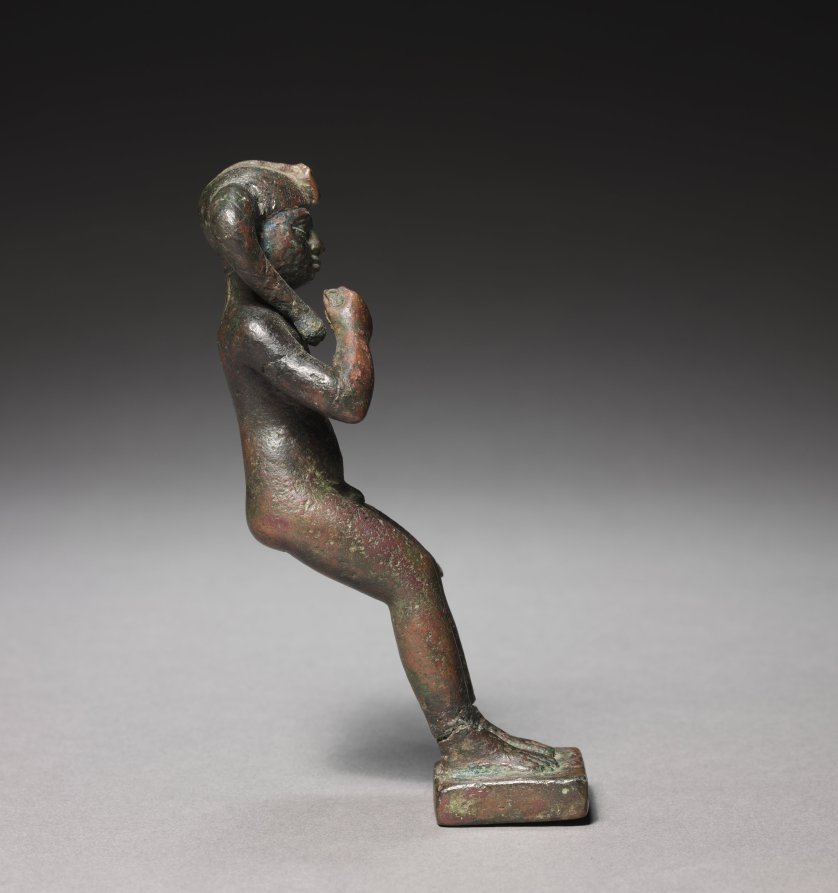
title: Statuette of Harpocrates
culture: Egypt, Greco-Roman period (332 BCE–395 CE), Ptolemaic dynasty (305–30 BCE)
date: 305–30 BCE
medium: bronze, solid cast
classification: Sculpture